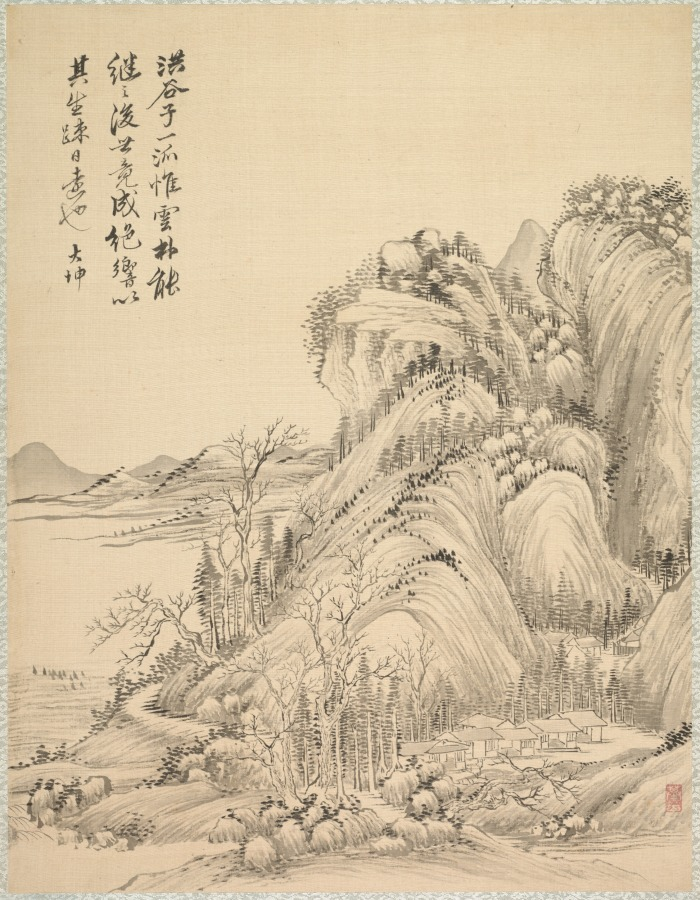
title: Dwellings beneath Folded Hills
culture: Japan, Edo period (1615–1868)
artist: Tsubaki Chinzan (Japanese, 1801–1854)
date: 1847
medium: album leaf; ink and color on silk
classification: Portfolio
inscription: Tsubaki Chinzan inscribed each leaf with the same inscription that Zhai Dakun wrote on his album leaves.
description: As the title of this album suggests, Tsubaki Chinzan painted each of the landscapes included in the album after interpretations of the styles of old masters by Chinese painter Zhai Dakun (翟大坤, active 1730–1804). In addition to the painted compositions, he also copied the inscriptions on Zhai Dakun's paintings.